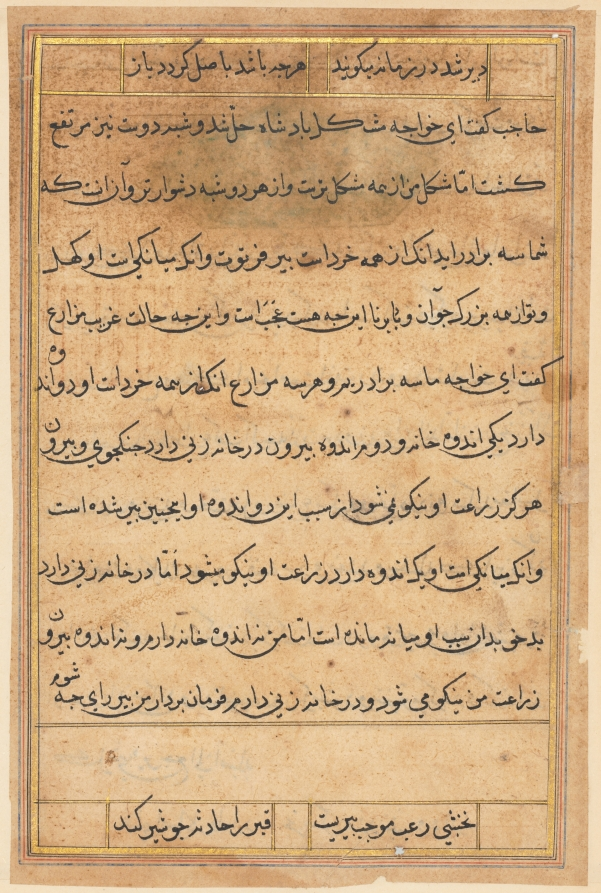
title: Page from Tales of a Parrot (Tuti-nama): text page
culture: Mughal India, court of Akbar (reigned 1556–1605)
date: c. 1560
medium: gum tempera, ink, and gold on paper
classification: Painting